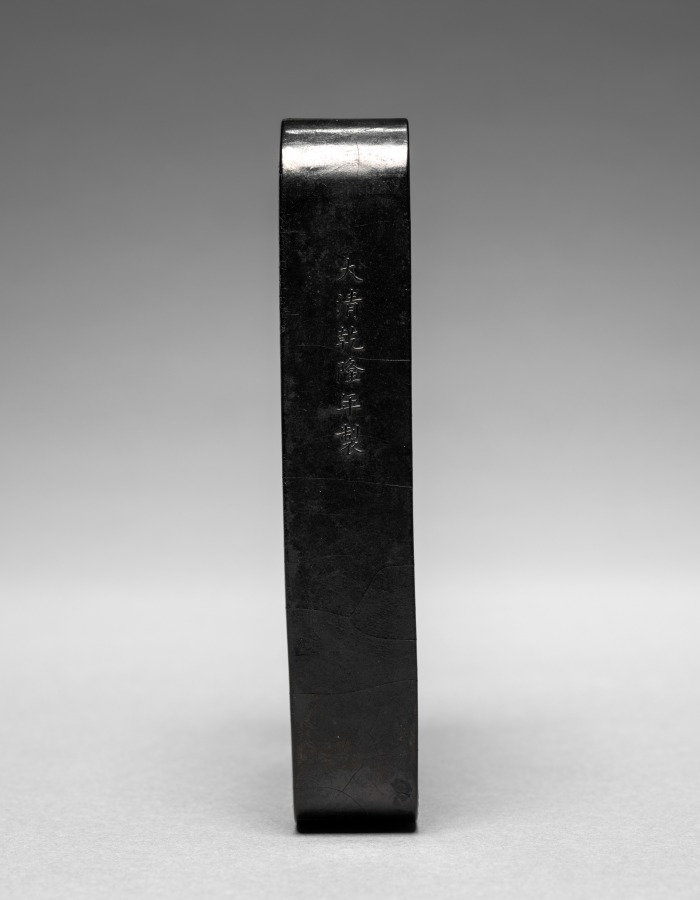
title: Ink Cake with Architectural Design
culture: China, Qing dynasty (1644-1911), Qianlong inscription, mark, and reign (1736-95)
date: 1736–95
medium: molded ink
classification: Miscellaneous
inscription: 大清乾隆年制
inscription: 待月樓珍藏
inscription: 御墨. 光分太乙. 吟詠春風里.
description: In China, access to political power was granted to those who passed the civil service examinations, a system that offered official service only at a high level of education. Chinese literati-officials, whose daily routine involved administrative work in an office, enjoyed precious objects on their writing desks that offered distraction and demonstrated good taste. By the Ming (1368–1644) and Qing (1644–1911) dynasties, these utensils of the literati studio also became collectibles and were treasured as artworks.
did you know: To make liquid ink, an ink cake is ground against an inkstone with a small quantity of water.